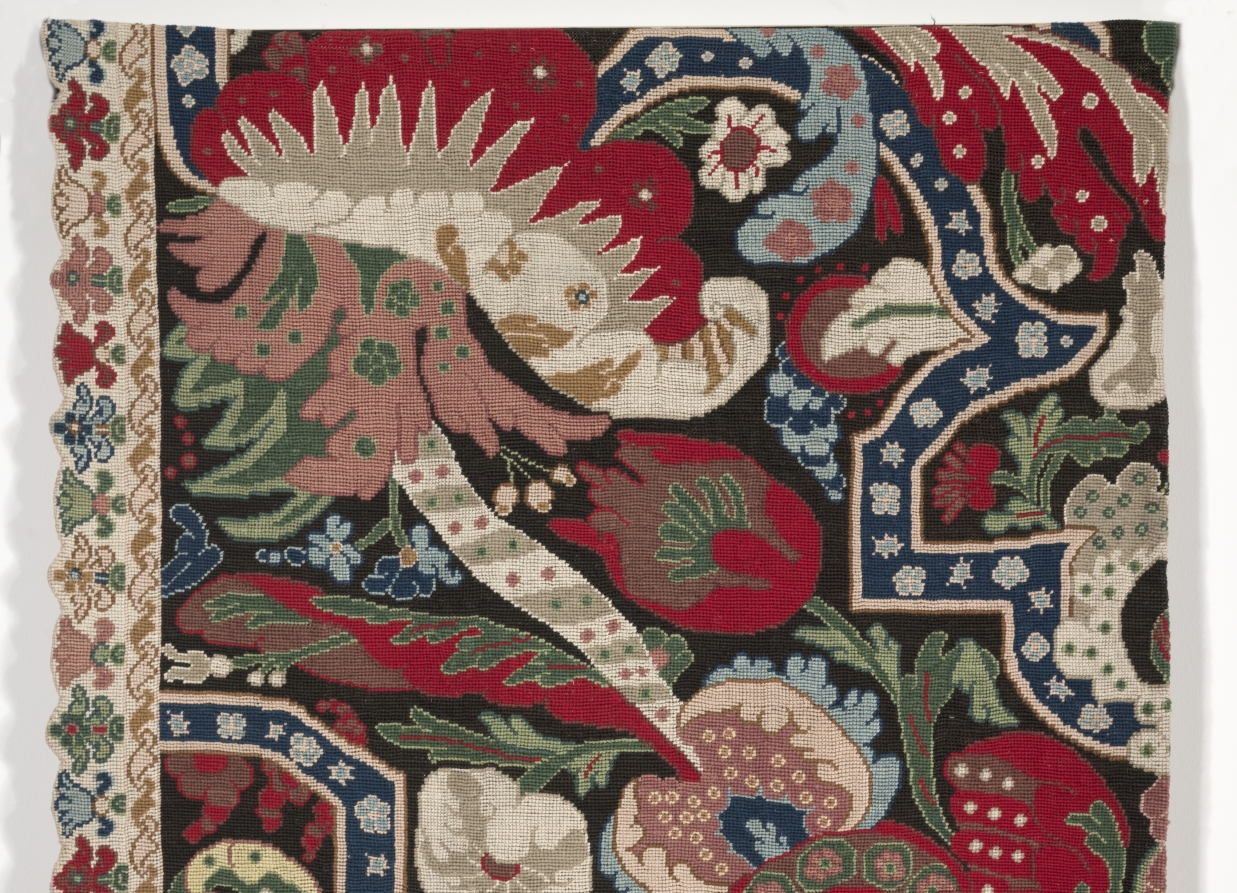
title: Needlework Bed Hanging in the Bizarre style (left half)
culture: France, 18th century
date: 1710–20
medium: Silk, wool; needlework, tent, and cross-stitch embroidery on canvas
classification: Embroidery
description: This panel is one of a pair that would have hung originally around a bed post as part of a full set of hangings on a bedstead in the early 1700s. Elaborate textile hangings were a conspicuous display of wealth since many ladies received their friends within their bedchamber. A full set enveloped the entire bedstead and, when closed, helped retain warmth long after the fire had gone out. This particular pair of panels is remarkable in that they represent many hours of highly skilled needlework. Their design is known as a "bizarre" pattern, which mimicked woven silks of the same era that were asymmetrical, boldly stylized adaptations of Asian fabrics that were coming into the European market from the trading routes at the time.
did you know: The design of this needlework panel is known as a "bizarre" pattern.